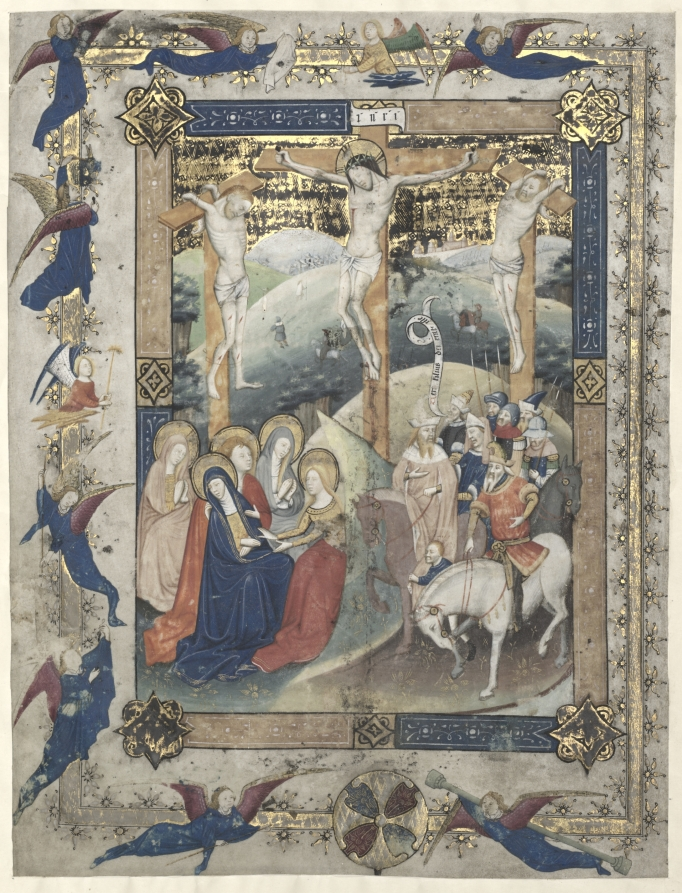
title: Leaf from a Missal: The Crucifixion (Frontispiece for the Canon of the Mass)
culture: North Netherlands, Augustinian Cloister of Agnietenberg, near Zwolle, 15th century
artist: Master of Otto van Moerdrecht (Netherlandish)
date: c. 1440–1450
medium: ink, tempera, and gold on vellum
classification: Manuscript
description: This splendid crucifixion scene originally served as the canon illustration in a liturgical missal. The open landscape is remarkable since it is not found in Dutch missals before the end of the 1500s. The large number of figures at the foot of the cross is also exceptional. The composition is thought to have been copied from a painting by Jan van Eyck, now lost. The painter of this miniature derives his name from the illuminations in the Old Testament commentary of Nicholas of Lyra, which Otto van Moerdrecht, canon of Utrecht Cathedral, gave to the nearby Carthusian monastery of Nieuwlicht in 1424. The style is found in several manuscripts traced to various towns in the North Netherlands. Recent scholarship points to a group of artists working in the same style in locations such as Guelders, Utrecht, and elsewhere, as opposed to one artist who moved from place to place.